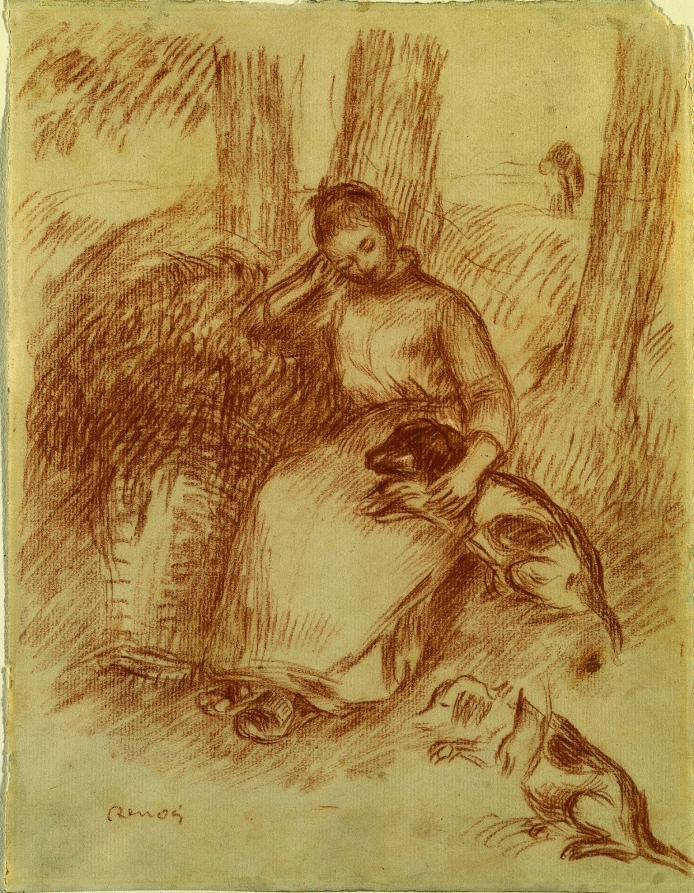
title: Peasant Girl with Dog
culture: France, 19th century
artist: Pierre-Auguste Renoir (French, 1841–1919)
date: c. 1894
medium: red chalk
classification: Drawing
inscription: signed, lower left, in red chalk: Renoir ; verso, upper left, in graphite: 8 ; upper left, in graphite: 41 x 50 ; lower left, on paper strip mounted to sheet, in graphite: 77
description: During the last decades of his career, Renoir worked prolifically in red chalk, which was used to develop a loose and sketchy style. In this drawing, the artist attempted to recapture the spontaneity that characterized Impressionist art a few decades earlier. By showing a young girl seated resting peacefully alongside a bale of hay, he idealized rural French life.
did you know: The art historian John Rewald supposedly called this work "one of the two or three most beautiful Renoir drawings in America."